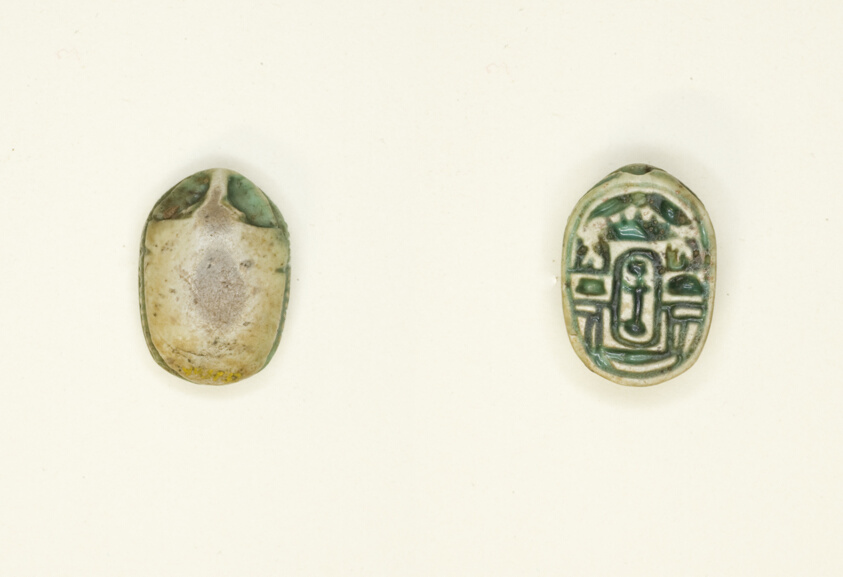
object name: Costume and Accessories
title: Scarab: Nefera with Hieroglyphs (kA-signs, xaw)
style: middle kingdom, egyptian, ancient, second intermediate period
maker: Egyptian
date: Middle Kingdom–Second Intermediate Period, Dynasties 12–17 (about 2055–1550 BCE)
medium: Glazed steatite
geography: Egypt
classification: scarab; ancient art; costume; amulet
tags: scarab beetle, cartouches, Hieroglyphs